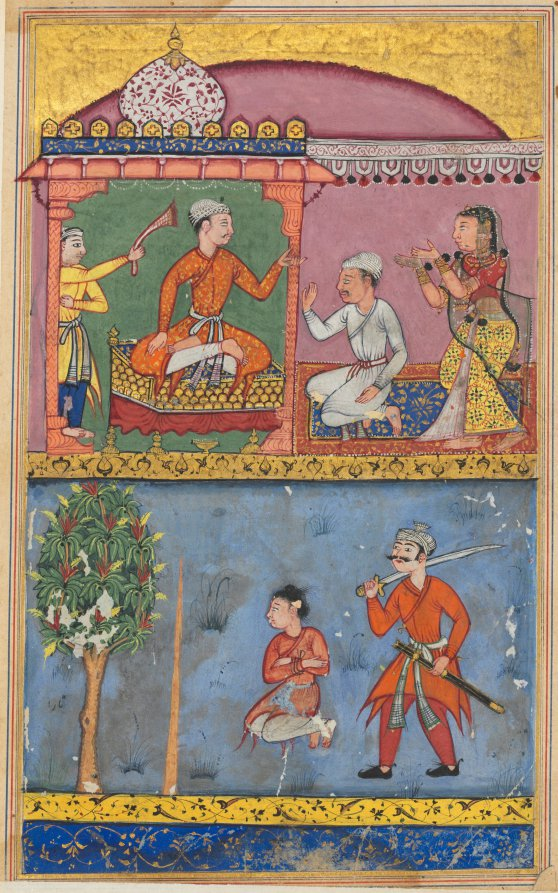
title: The handmaiden appeals for justice and the prince is taken to the execution site for the fourth time, from a Tuti-nama (Tales of a Parrot): Eighth Night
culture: Mughal India, court of Akbar (reigned 1556–1605)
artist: Tara 2 (Indian, active 1550s-1590s)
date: c. 1560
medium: gum tempera, ink, and gold on paper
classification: Painting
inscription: tārā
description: Above, the enthroned king hears the appeal of the distressed handmaiden. Below, the bound and kneeling prince awaits his execution. Although the prince has been falsely accused of assaulting the handmaiden, he has taken a temporary vow of silence and is unable to defend himself. A vizier will stall the execution with a story about the dangers of women.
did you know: Two painters named Tara are known from the Akbar period.